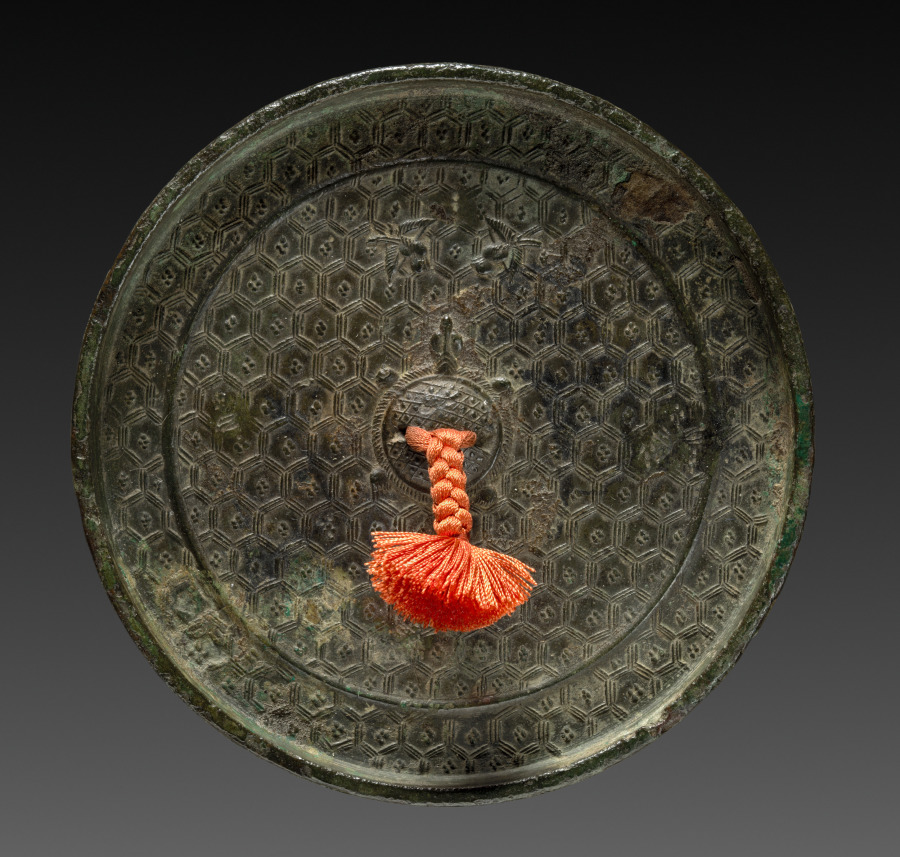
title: Mirror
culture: Japan, Muromachi period (1392–1573)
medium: bronze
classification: Metalwork